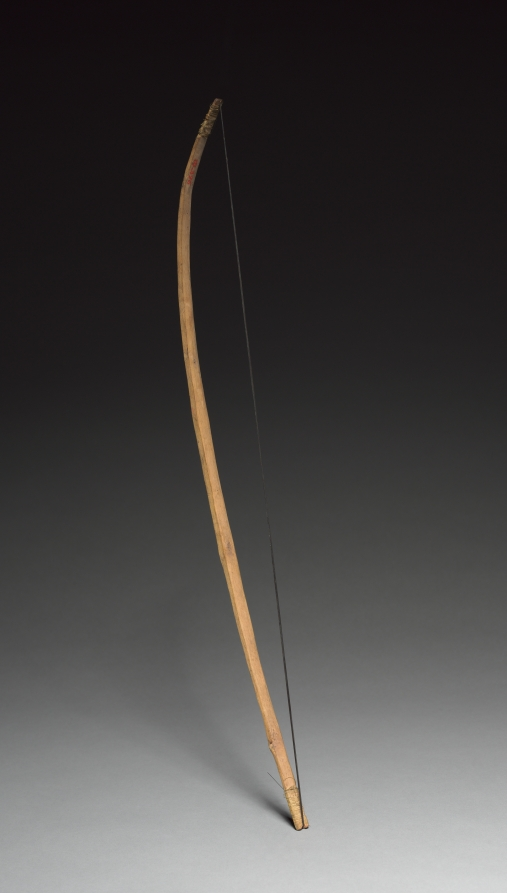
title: Bow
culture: America, North American Indian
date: 20th century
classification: Musical Instrument